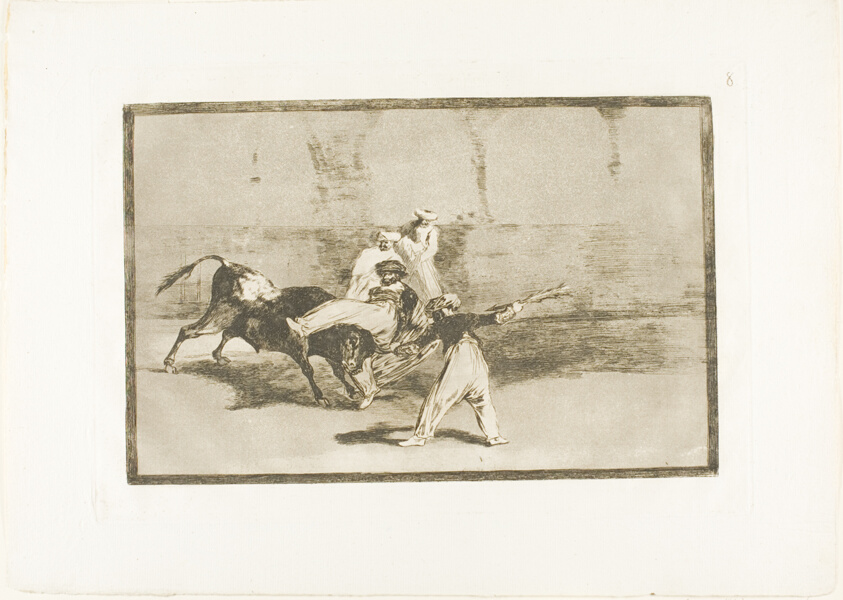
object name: Print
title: A Moor Caught by the Bull in the Ring, plate 8 from The Art of Bullfighting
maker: Francisco José de Goya y Lucientes (Spanish, 1746-1828)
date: 1814/16, published 1816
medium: Etching, burnished aquatint and drypoint on ivory laid paper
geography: Spain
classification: etching; print; prints and drawing